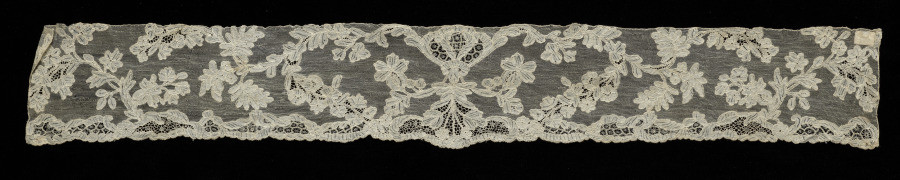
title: Lace Edging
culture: Italy, Burano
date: 1700s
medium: Linen: needle lace (Burano Point)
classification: Lace